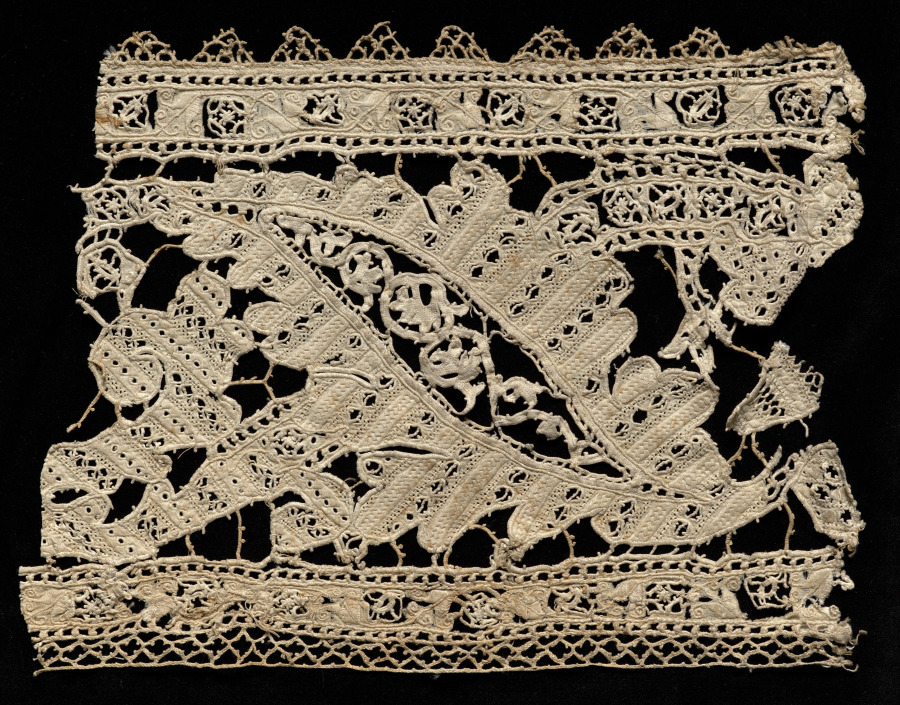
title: Fragment of Lace Flounce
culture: Italy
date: 1500–1540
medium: Linen: needle lace, cutwork (taglia tela) and bobbin lace and embroidery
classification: Lace